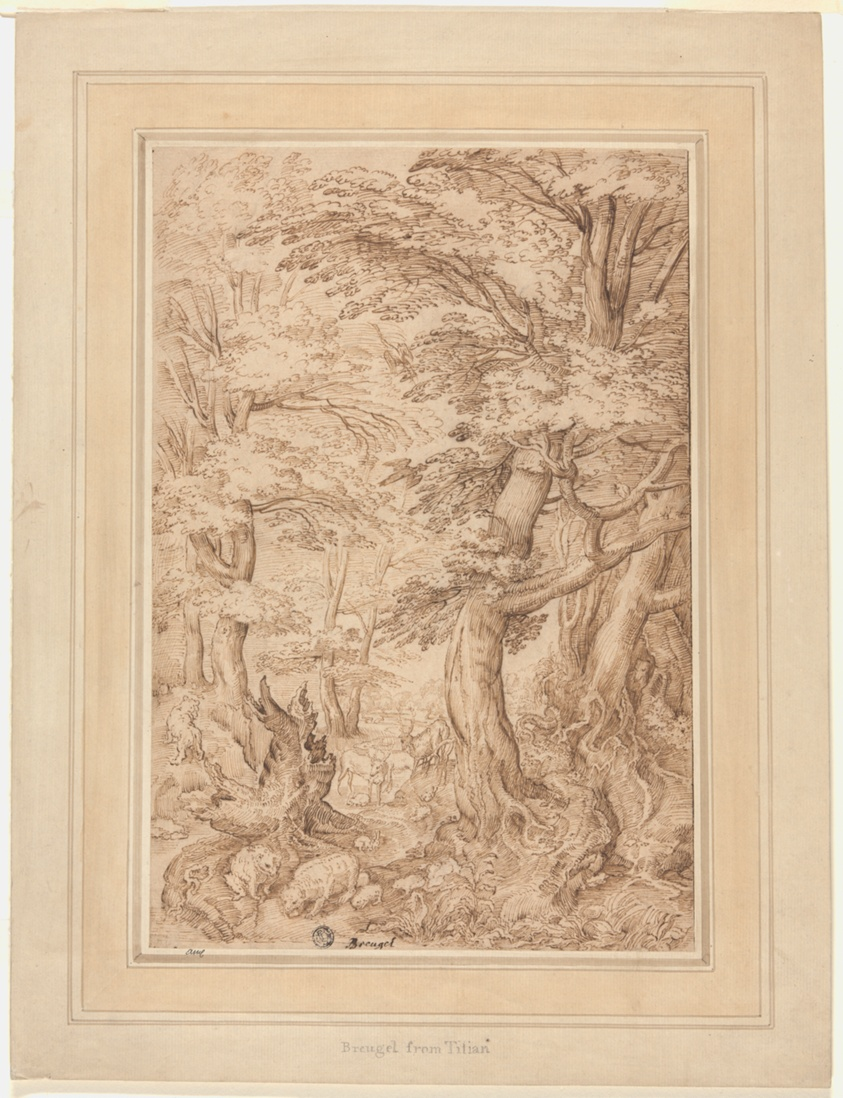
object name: Drawing and Watercolor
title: Forest Landscape with Wild Animals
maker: After Pieter Bruegel, the elder; Flemish, 1525/30-1569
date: late 16th century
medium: Pen and brown ink on buff laid paper, laid down on card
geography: Flanders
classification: pen and ink drawings; drawings (visual works); prints and drawing